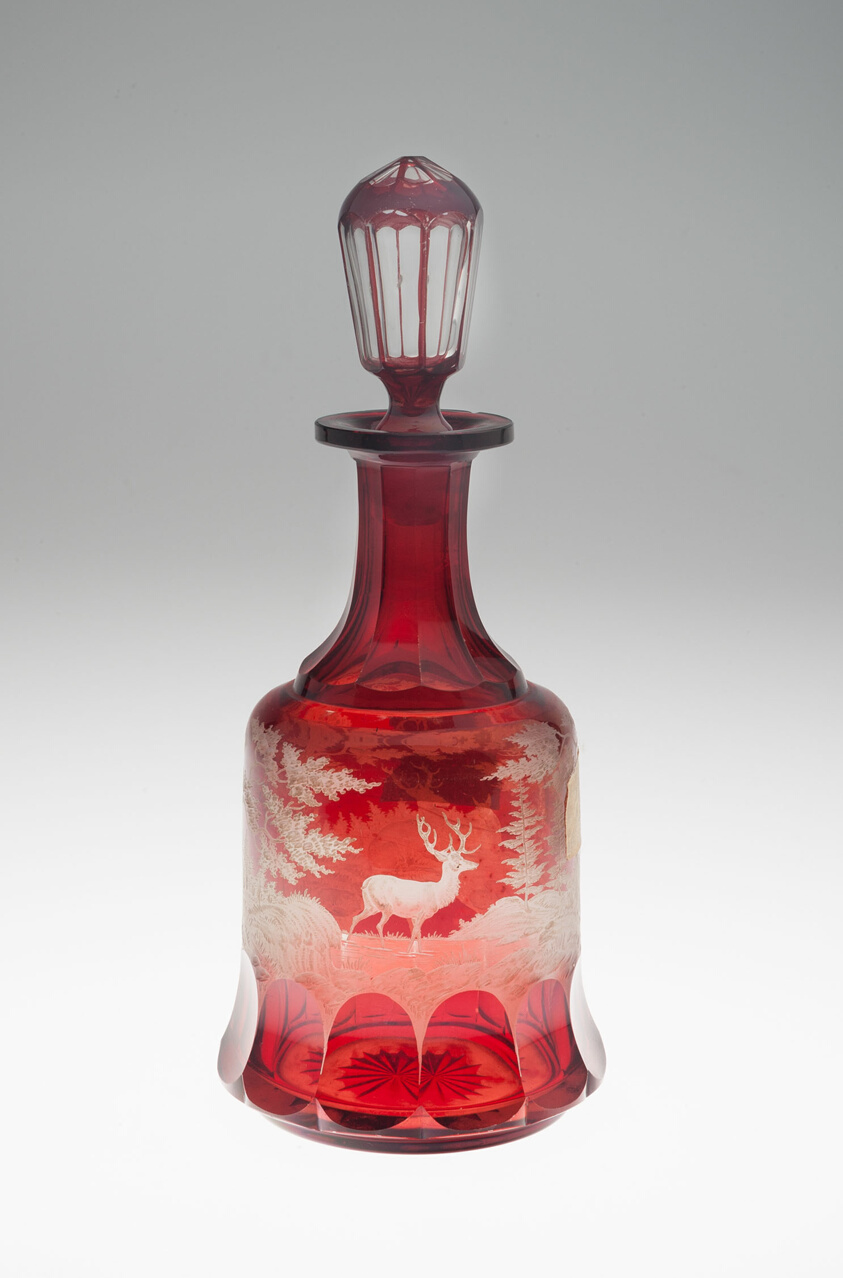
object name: Glass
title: Decanter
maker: Bohemia, Czech Republic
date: c. 1840/50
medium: Glass with red flashing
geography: Bohemia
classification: glass; european decorative arts